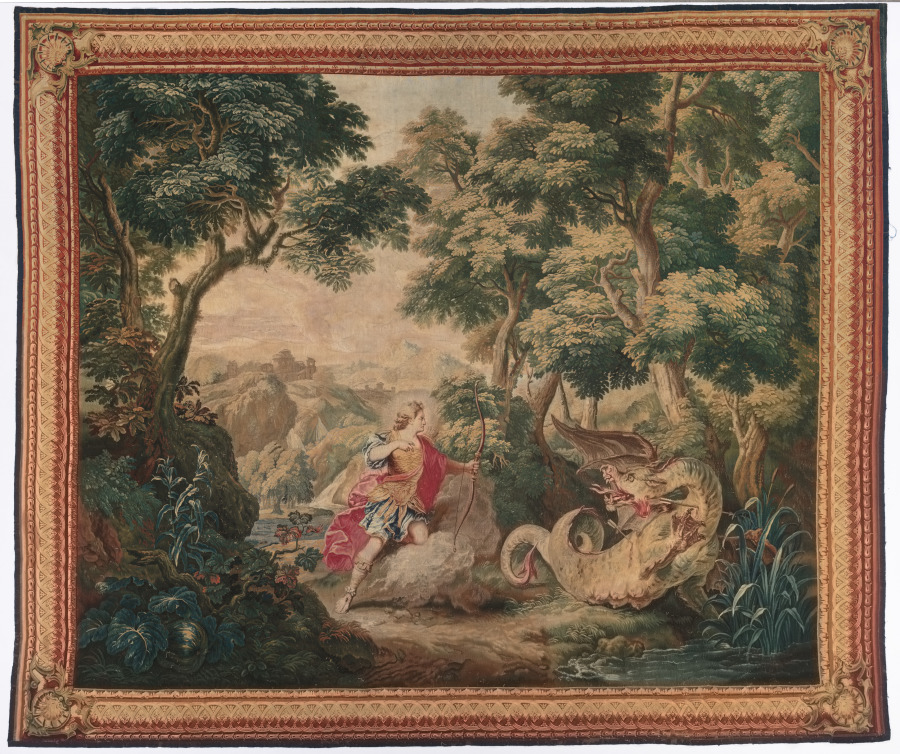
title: Apollo and the Serpent Python (from Set of Ovid's Metamorphoses)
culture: France, 18th century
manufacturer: Gobelins Manufactory (France, Paris, est. 1662)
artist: after Nicolas Bertin (French, 1668–1736)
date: 1700–1730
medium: tapestry weave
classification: Tapestry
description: Apollo’s dynamic posture with his right arm pulled back and his left holding a bow indicates that he has just shot the arrow piercing the snarling serpent’s throat and body. Apollo’s triumph over powerful Python, the fearsome serpent offspring of Mother Earth or Gaia, boosted his ego tremendously, leading to his tragically unsuccessful pursuit of Daphne. The regally dressed hunter and his prey are seen alone in an environment teeming with natural life that includes a pumpkin patch. In the creation of this textile, the manufacturer used blue and yellow dye to create the color green which has since degraded, causing the pumpkins and their leaves to appear blue.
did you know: During the French Revolution, Gobelins tapestries were sometimes disassembled to harvest the gold threads.